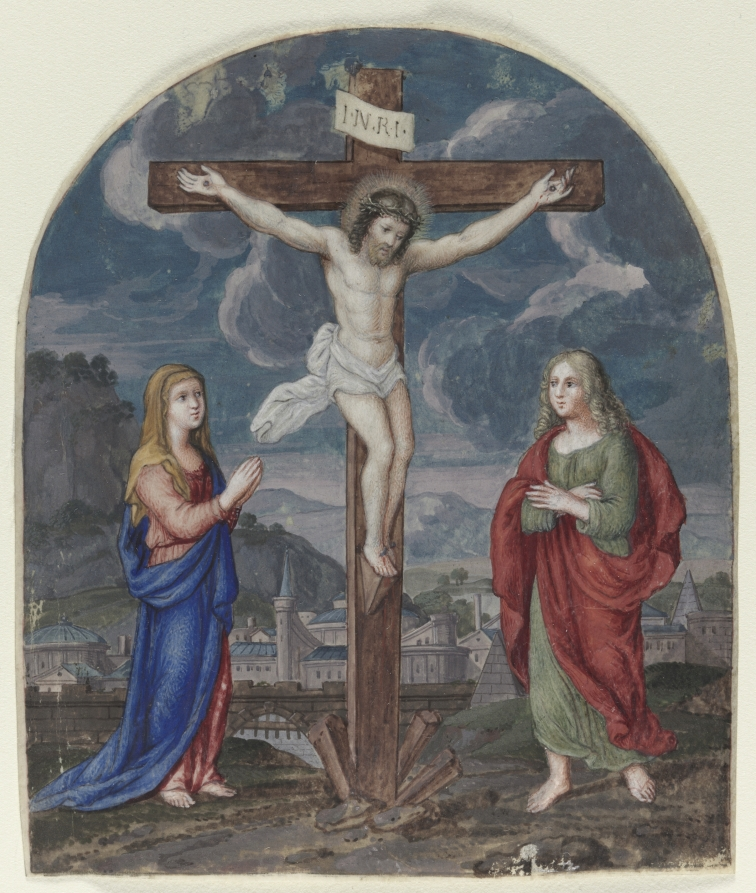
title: The Crucifixion: Miniature Excised from a Prayer Book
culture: Flanders, Antwerp(?)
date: c. 1540–1550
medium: tempera on vellum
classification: Manuscript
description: The illuminator is unknown, but his style seems to conform to that known as "Antwerp Mannerism." It emerged among a group of Antwerp painters during the first half of the 1500s. Bolstered by its rich trade and cultural contacts, the port city of Antwerp attracted hundreds of artists-many of them from northern France, the Rhineland, and especially Holland-who joined the local painters’ Guild of Saint Luke, established large painting and sculpture workshops, and fed an expanding market for the production and export of art. Though stylistic traits differed from artist to artist, some defining features of Antwerp Mannerist painting are dramatic gestures, figural arrangements, lavish costumes, vivid, sometimes abrasive coloristic effects, imaginative architecture that freely combines Gothic and Renaissance elements, and demonstrative technical virtuosity